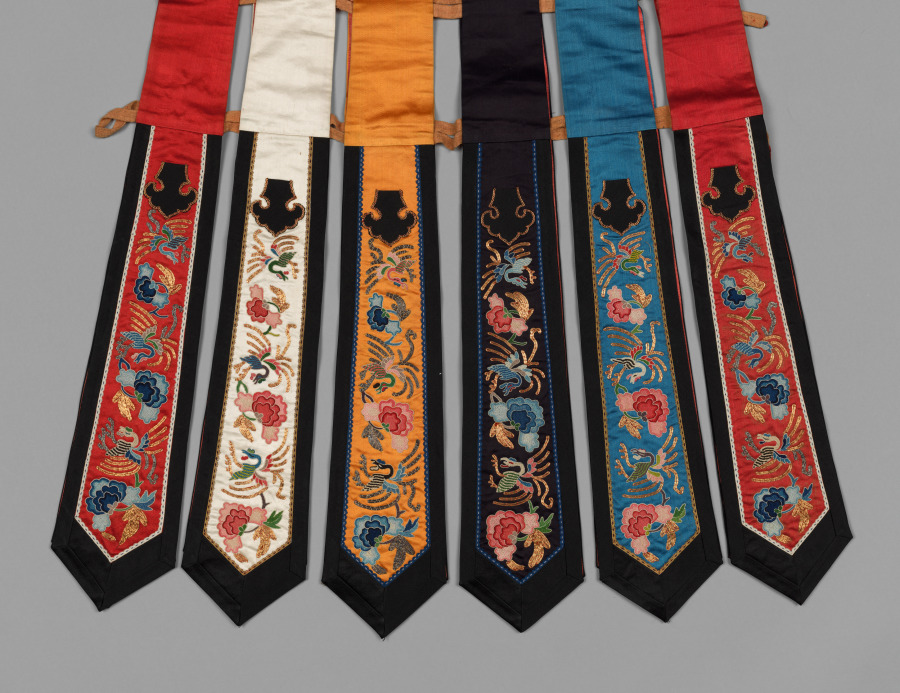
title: Rainbow Skirt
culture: China, Qing dynasty (1644-1911)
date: late 1800s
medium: Silk: embroidery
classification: Garment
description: This bridal garment is referred to as a rainbow skirt. Originally jingling bells hung from the ends of each strip.